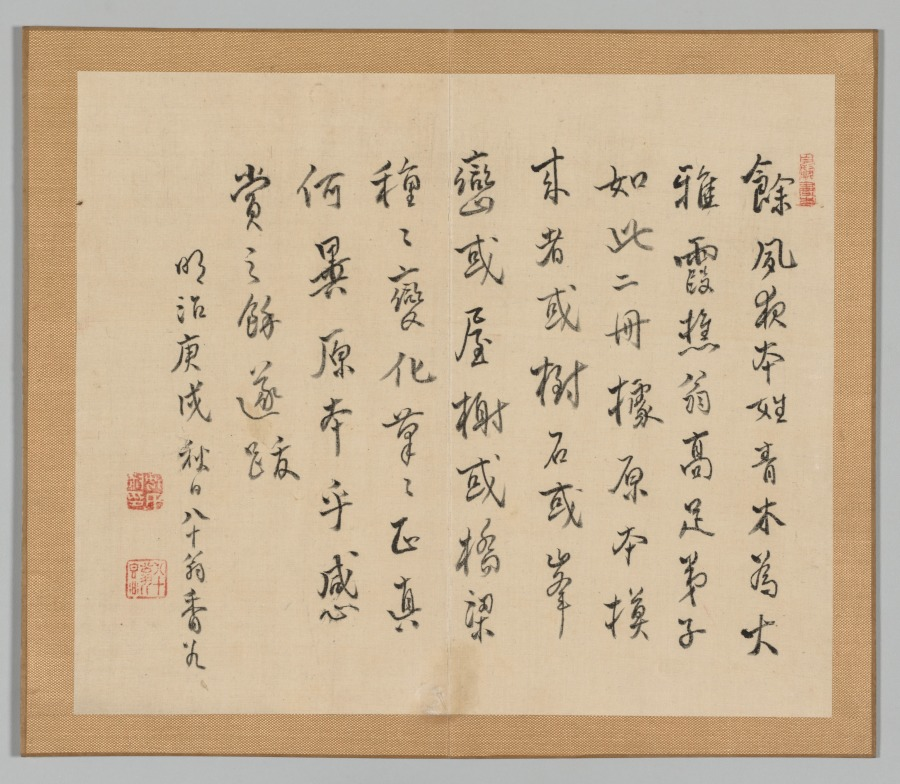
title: Postscript from “Reverberations of Taiga”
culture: Japan, Meiji period (1868–1912)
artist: Aoki Shukuya (Japanese, d. 1802)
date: 1910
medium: double-leaf from a pair of albums; ink on silk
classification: Portfolio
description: Kusakabe Meikaku, one of the three most famous Japanese calligraphers of his time, provided a title leaf, CMA 1979.73.1.1, for a pair of albums of paintings after Ike Taiga (池大雅) (1723–1776) by his student Aoki Shukuya (青木夙夜) (died 1802). Murata Kōkoku, a well-traveled painter with an extensive network of colleagues in China and Japan, wrote a postscript for the albums in which he explained that the paintings are faithful copies after Taiga’s images of rocks, mountains, residences, and so forth. These two artists respectfully documented Shukuya’s work more than 100 years after his death.